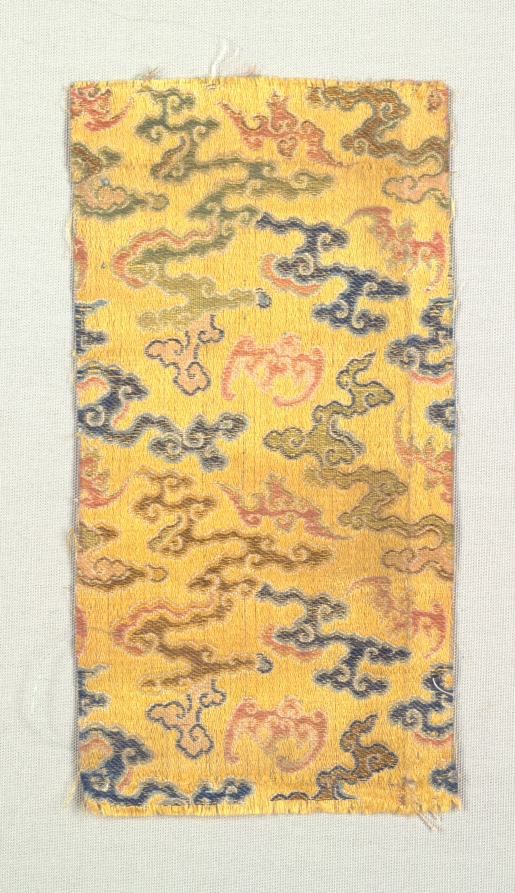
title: Fragment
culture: China, Qing dynasty (1644-1911)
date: 1700–20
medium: satin ground; silk diasper weave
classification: Textile